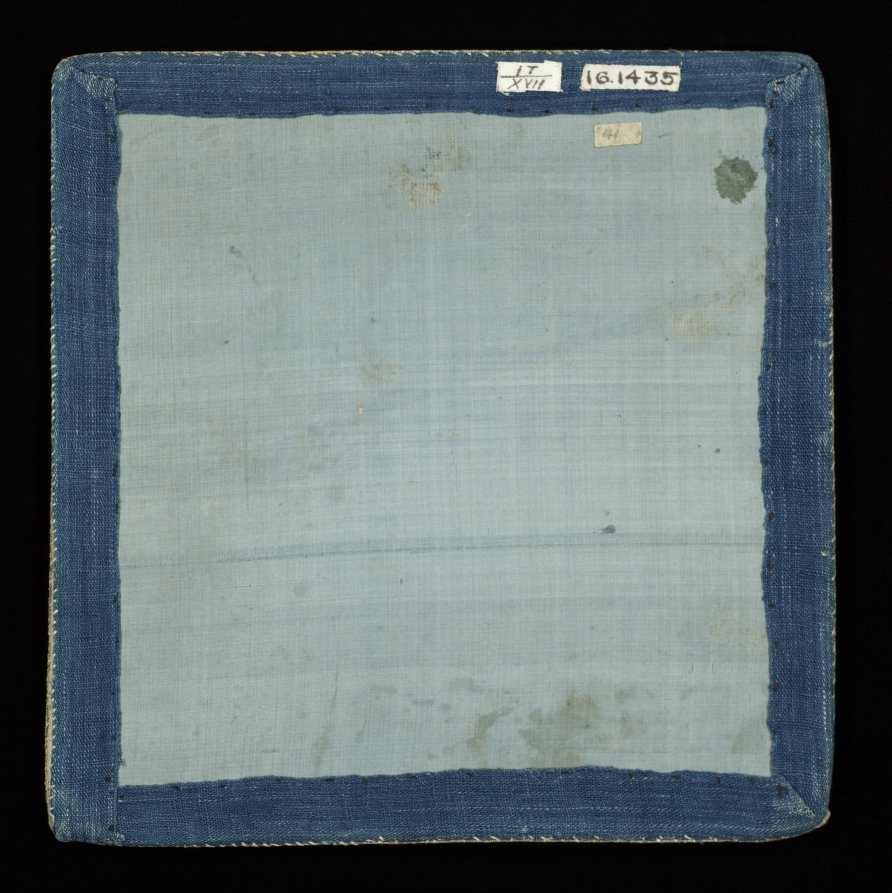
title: Burse (Corporal Case)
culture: Italy, Genoa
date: 1600s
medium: Silk velvet: cut and uncut, metal thread lace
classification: Velvet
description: This sumptuous polychrome velvet displays a central vase with abundant flora and exotic leaves flanking curving blossoming fronds on a gilt-metal thread ground. The pattern was created with five colors of cut and uncut (loops) velvet pile. Only the pile warps for the lush green velvet occur across the entire cloth, while each additional color appears in vertical stripes—crimson, peach, rose, and purple. These widely acclaimed velvets from Genoa were the most colorful woven in Europe. Both the long stole and the shorter maniple are insignia of the office of deacons, priests, and the higher clergy. The stole was worn under a chasuble according to the office and the maniple was hung on the left forearm. The burse is a stiff receptacle in which the folded corporal, a white linen cloth on which the sacred bread and chalice are placed during the Mass, is carried to and from the altar. The upper fabric matches the chasuble, the bottom is a plain silk, and the interior has an obligatory linen lining.